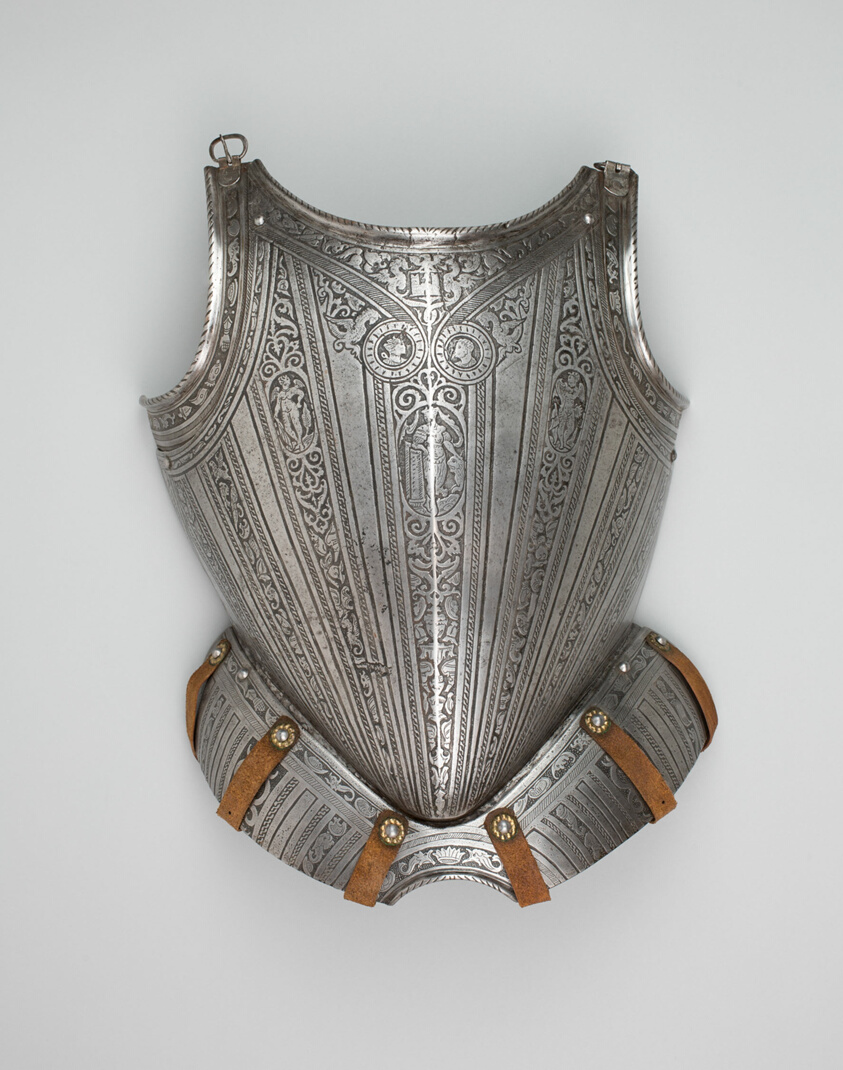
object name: Armor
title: Breastplate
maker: North Italian, probably Milan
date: c. 1580 with some modern restorations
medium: Steel, brass, and leather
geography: Milan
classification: suit-element; armor; arms and armor